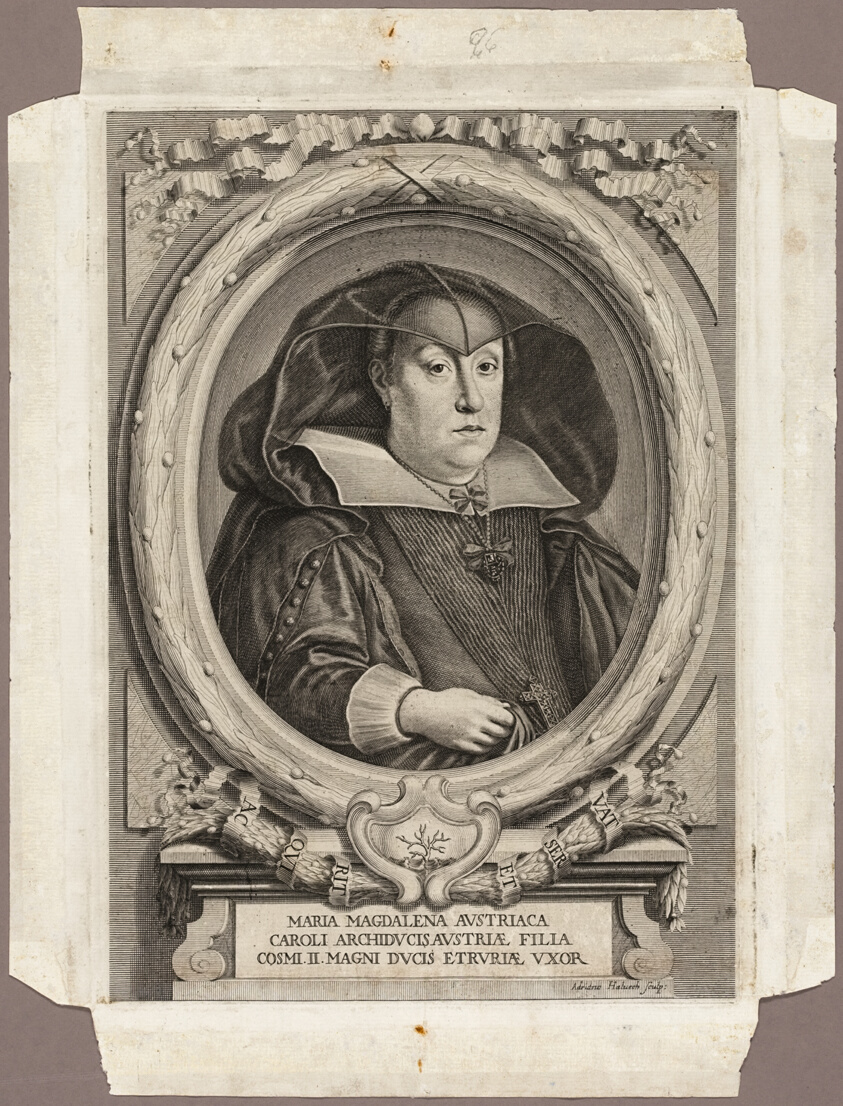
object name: Print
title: Maria Magdalena of Austria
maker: Adriaen Haelwegh (Dutch, born 1637); published by Giuseppe Allegrini, Florence, 1761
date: 1666; published 1761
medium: Engraving on ivory laid paper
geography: Netherlands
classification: engraving; paper; print; prints and drawing